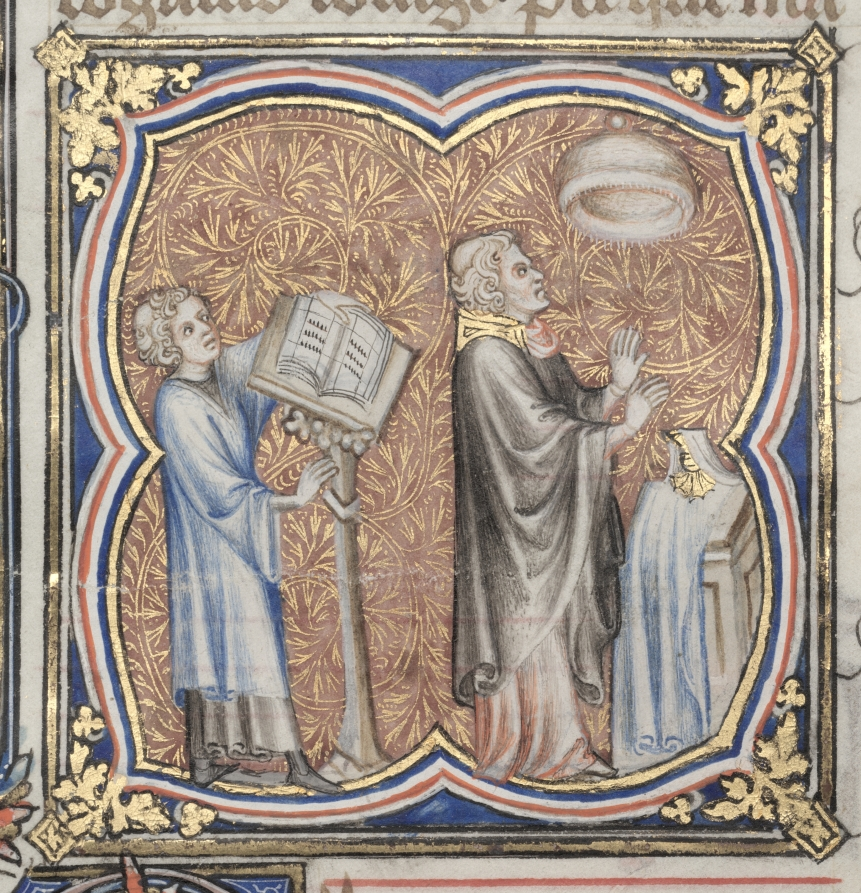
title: The Gotha Missal: Fol. 61r, A Priest Singing the Office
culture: France, Paris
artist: Master of the Boqueteaux (French)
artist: and Workshop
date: c. 1375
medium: ink, tempera, and gold on vellum; blind-tooled leather binding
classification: Bound Volume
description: The style and quality of this manuscript's decoration is typical of deluxe Parisian books made for aristocratic or royal patrons. Most of the book's decoration appears to be the work of the Master of the Boqueteaux, an artist active at the court of King Charles V (died 1380). His style was apparently shared by a number of book illuminators working in and around Paris. It is very possible that the Gotha Missal belonged to Charles V, but is not provable because the manuscript has no royal portraits and lacks a colophon. Given the book's magnificent decoration, however, it would seem that it was produced for a Valois prince, if not for the king himself. The manuscript receives its name from the German dukes of Gotha, its later owners.